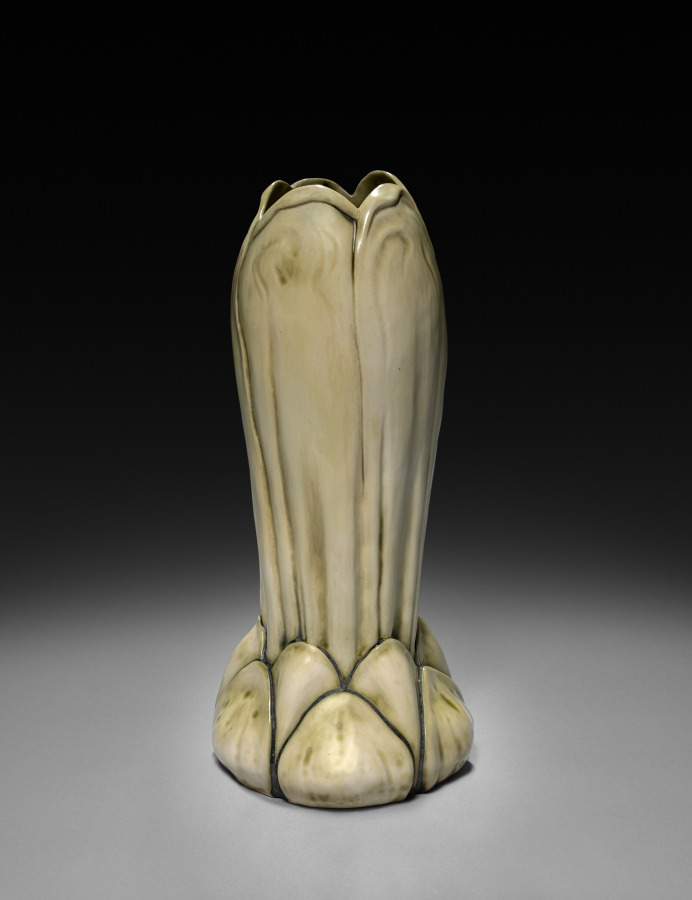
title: Artichoke Vase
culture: America, New York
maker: Tiffany Studios (United States, New York, 1902–32)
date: c. 1905–10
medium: Glazed white clay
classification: Ceramic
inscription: engraved on underside: LCT 7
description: By 1900 Louis Comfort Tiffany had expanded his empire by increasing the firm’s production of “fancy goods,” including inkstands, candlesticks, clocks, small boxes, desk sets, tea screens, and other functional objects. Along with the array of artistic glass designs from his factory in Corona, Queens, works in ceramic, bronze, other metals, and even jewelry abounded. These affordable luxury items were designed with as much thought to artistry as the great stained glass windows and lamps through which the firm enjoyed unrivaled success.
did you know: Ceramic works were Louis Comfort Tiffany's contribution to the art pottery movement of the early 1900s.